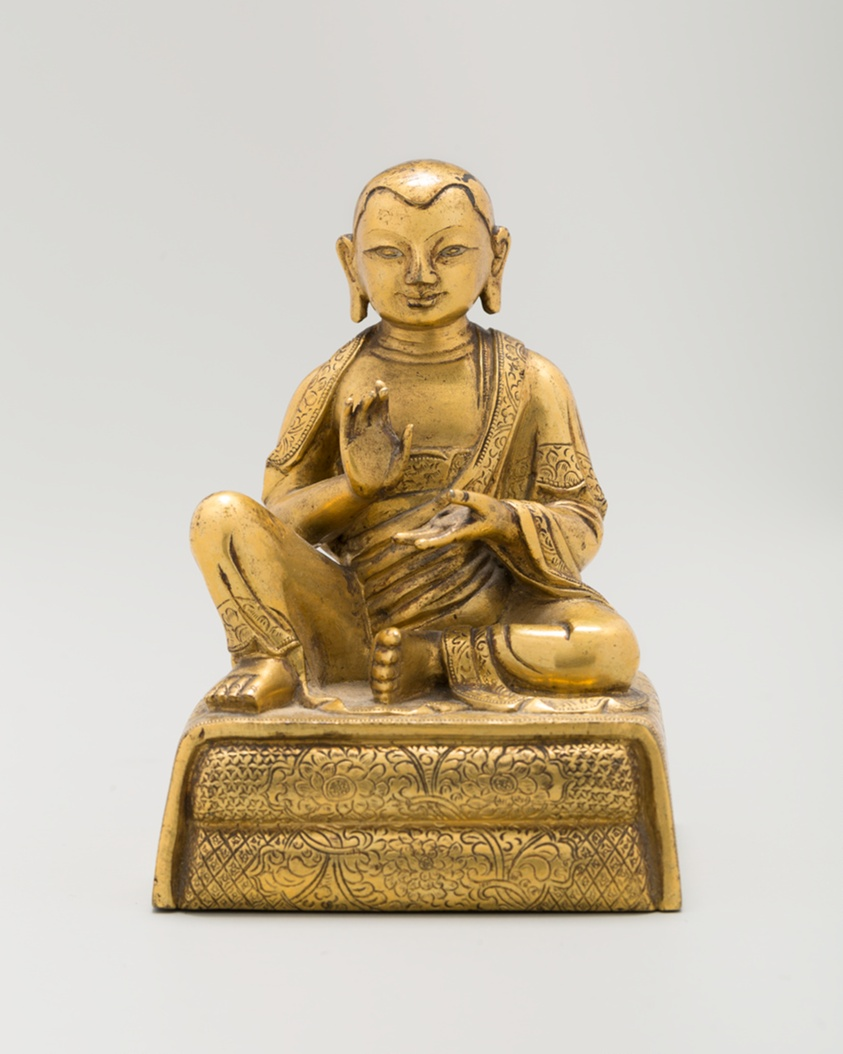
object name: Sculpture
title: Luohan (Arhat)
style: Chinese (culture or style)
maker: China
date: Qing dynasty (1644–1911), 18th century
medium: Brass alloy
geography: China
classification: brass; metal; sculpture; asian art